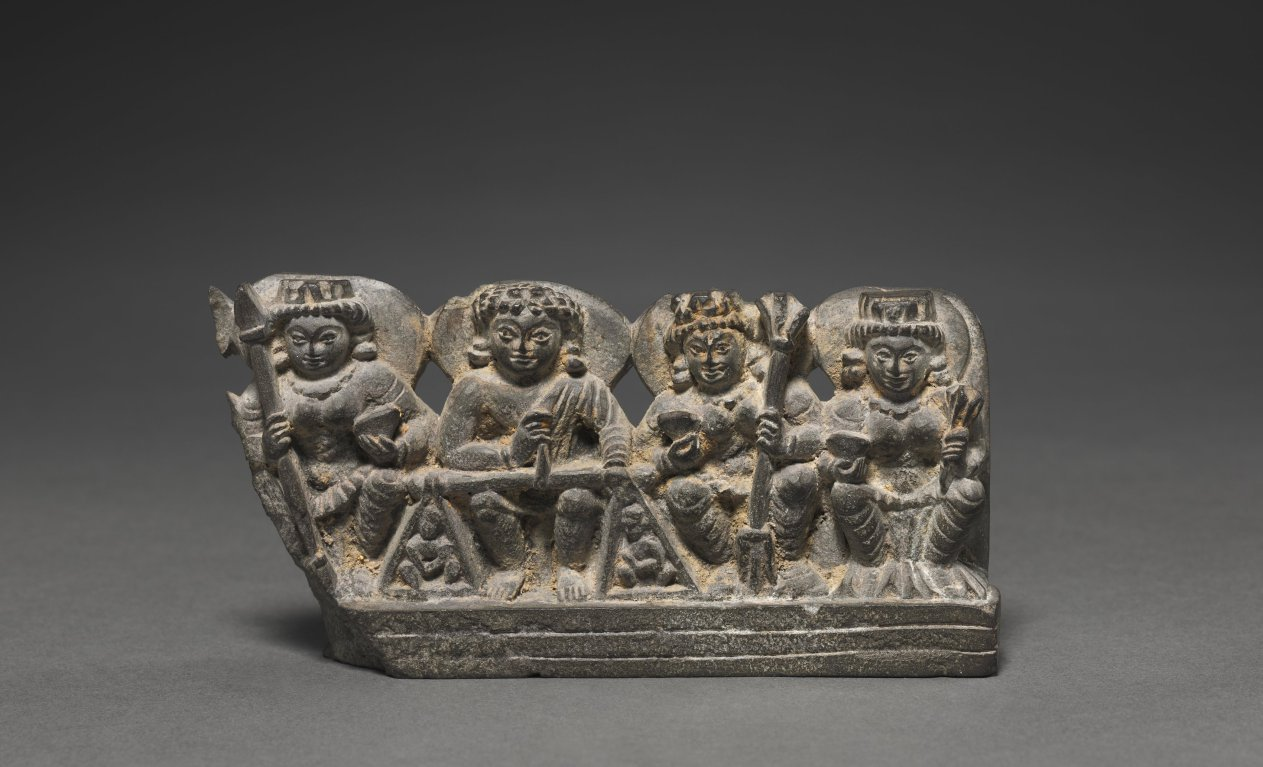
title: Yama as Dharma, the Judge of the Deceased with His Consorts (miniature stele)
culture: Northwest India or Kashmir, 9th century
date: 800s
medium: schist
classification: Sculpture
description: This miniature stele (partially broken on one side) depicts the God of Death, Yama, flanked by his consorts. Yama is depicted in his aspect as the Judge of the Deceased, Dharma, which is suggested by the balance he holds in his hands with two figures on each extreme of the scale. His consorts each carry a bowl and a different type of spear. He was probably originally surrounded by four of them, two on each side, but only three now remain.